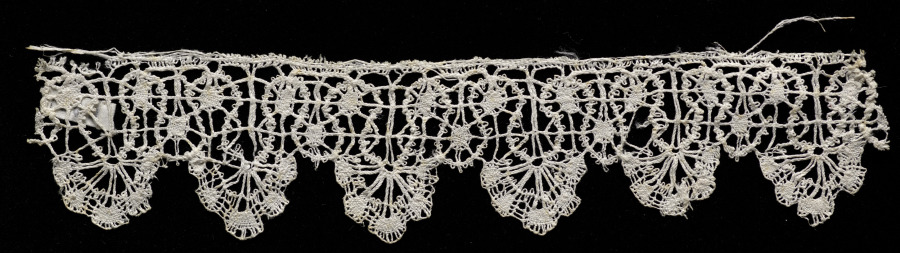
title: Lace Edging with Bell Points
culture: Italy, Genoa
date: 1600–1650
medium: Bobbin lace (rose lace)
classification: Lace